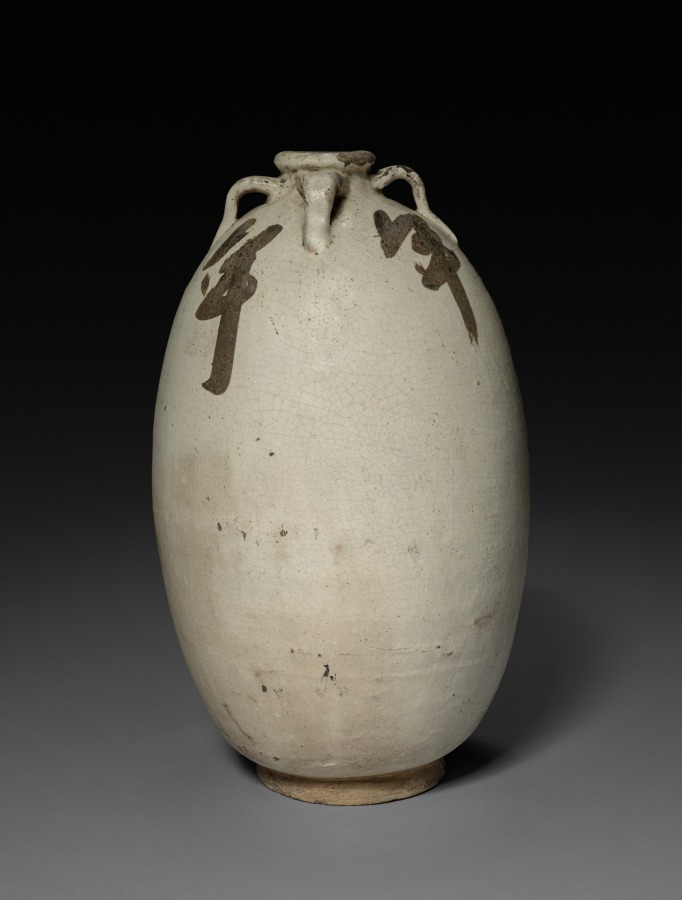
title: Wine Jar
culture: China, Yuan dynasty (1271-1368)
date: 1271–1368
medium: Glazed stoneware; Cizhou ware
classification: Ceramic